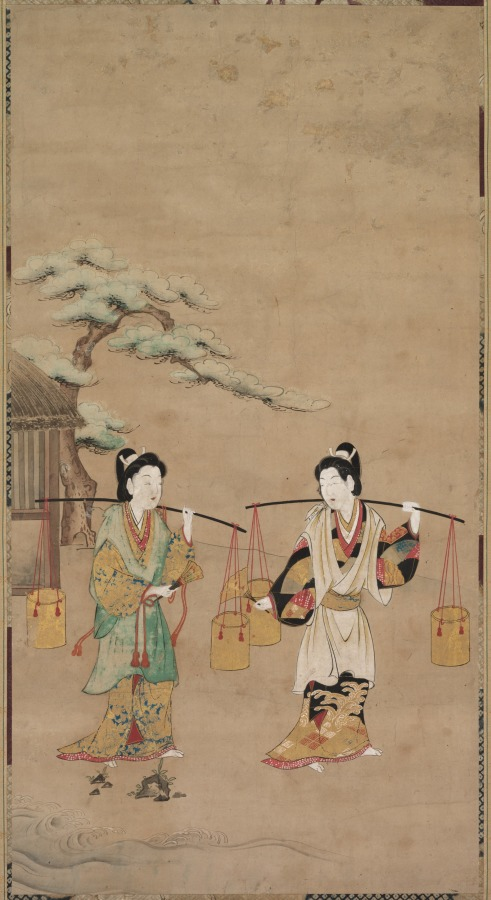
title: Scene from a Noh Play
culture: Japan, Edo period (1615–1868)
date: early 1700s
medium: hanging scroll; ink, color, and gold on paper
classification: Painting